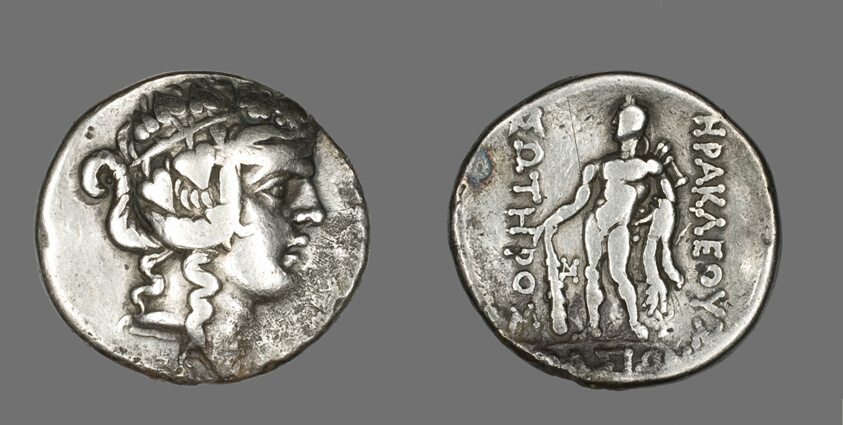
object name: Coin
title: Tetradrachm (Coin) Depicting the God Dionysos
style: greek, ancient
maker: Greek; Thasos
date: after 148 BCE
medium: Silver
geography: Thásos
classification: coin; ancient art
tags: Heracles, gods (deities), mythological figures